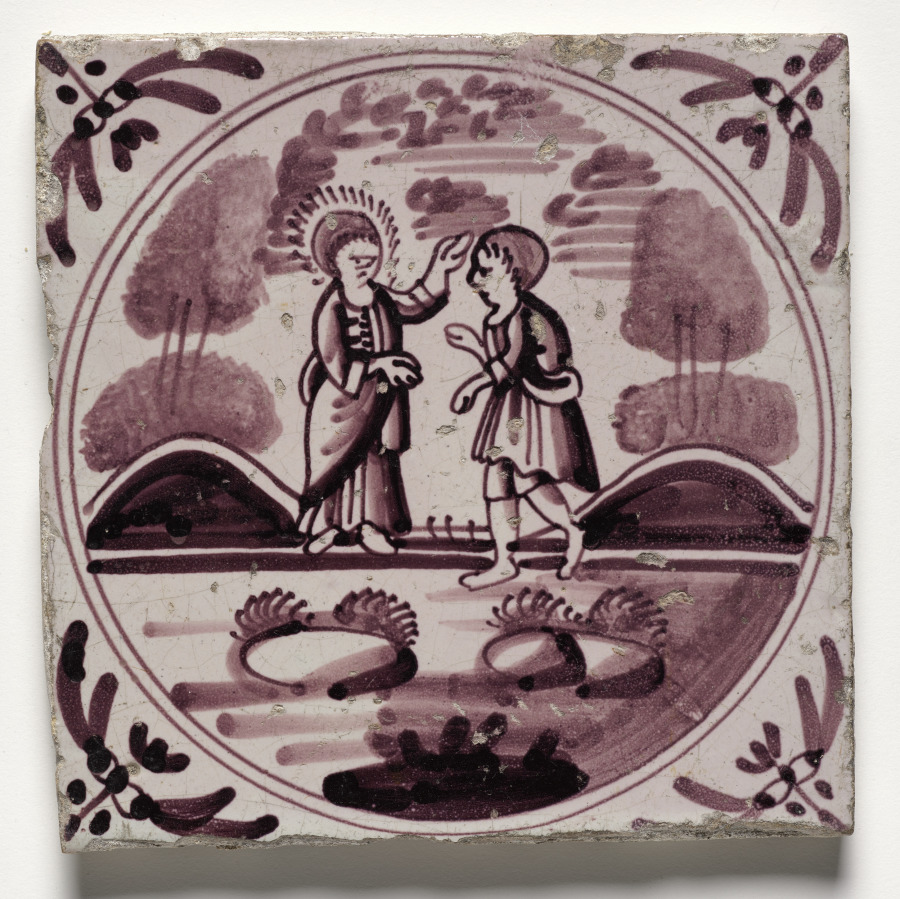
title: Tile- New Testament Scene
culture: Netherlands, Holland, Delft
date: c 1600– 1700s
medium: glazed ceramic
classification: Ceramic